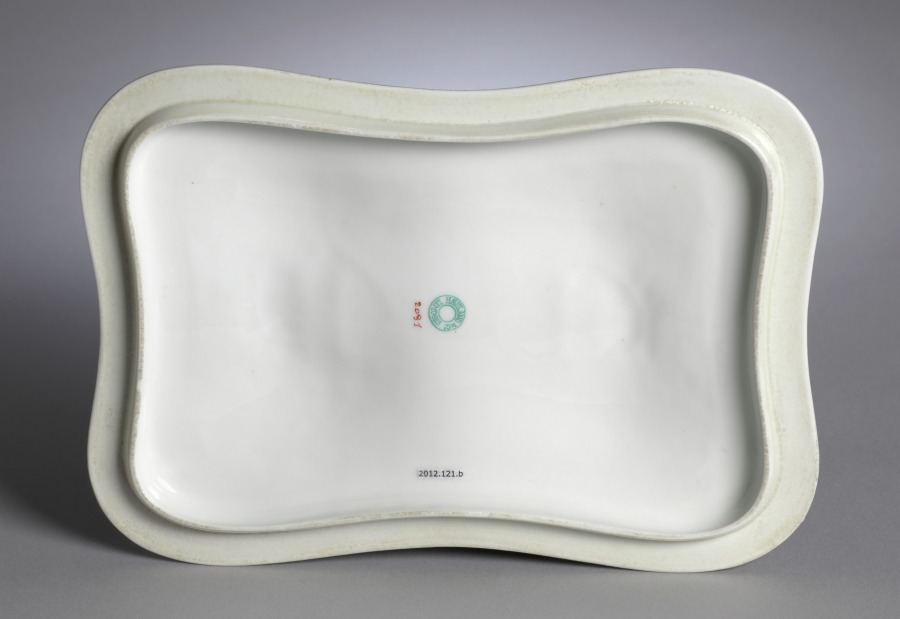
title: Cover for a Vegetable Bowl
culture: France, Limoges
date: c. 1890–1910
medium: porcelain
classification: Ceramic